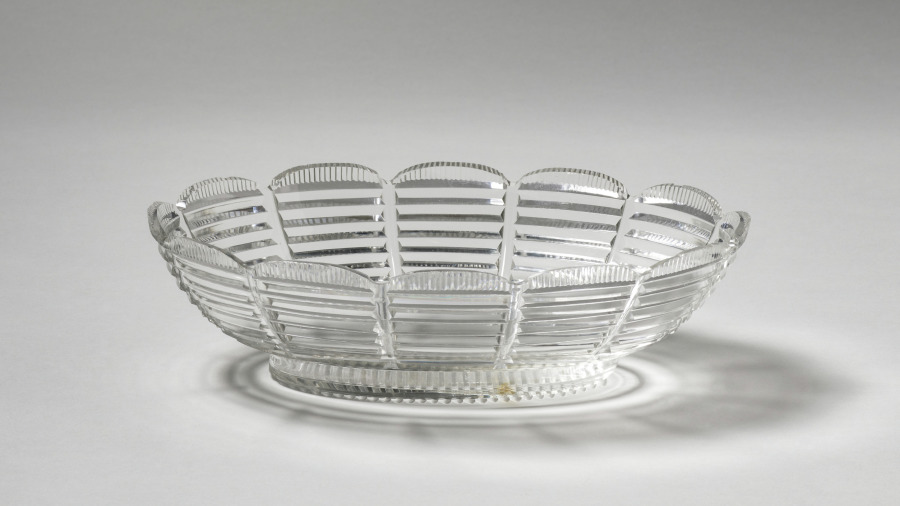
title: Centerpiece (glass bowl)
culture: England, 18th century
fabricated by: William Pitts (British)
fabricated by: Joseph Preedy (British)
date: 1792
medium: silver and glass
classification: Silver